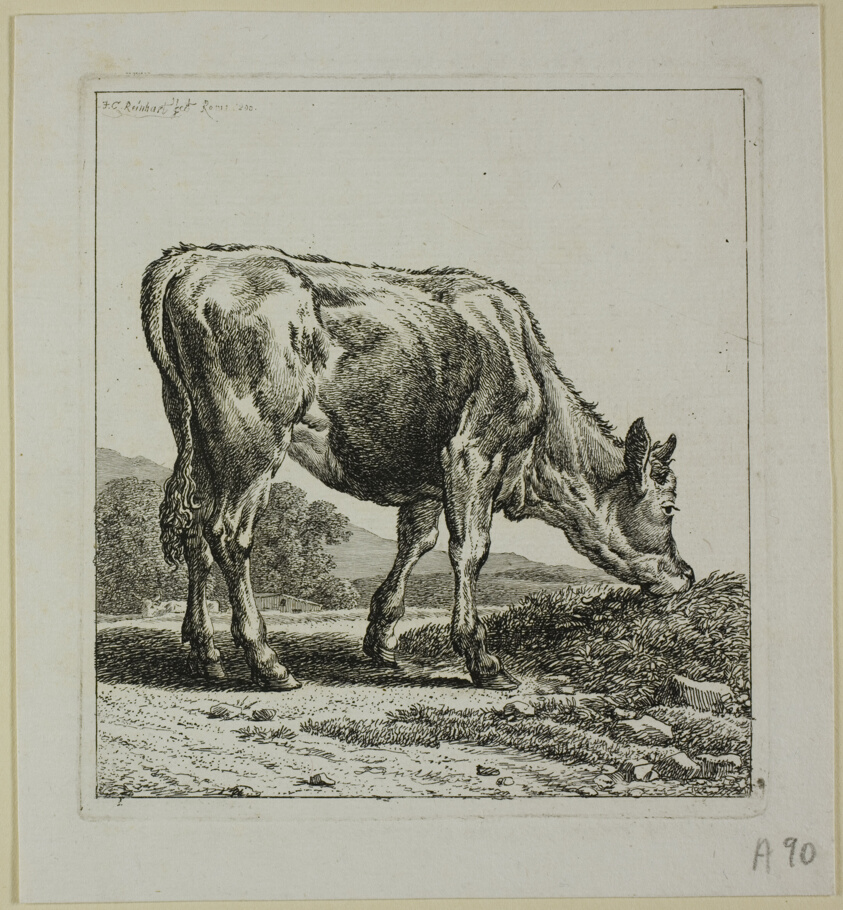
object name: Print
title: Calf Feeding, from Die Zweite Thierfolge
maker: Johann Christian Reinhart (German, 1761-1847)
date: 1800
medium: Etching on ivory laid paper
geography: Germany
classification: etching; print; prints and drawing